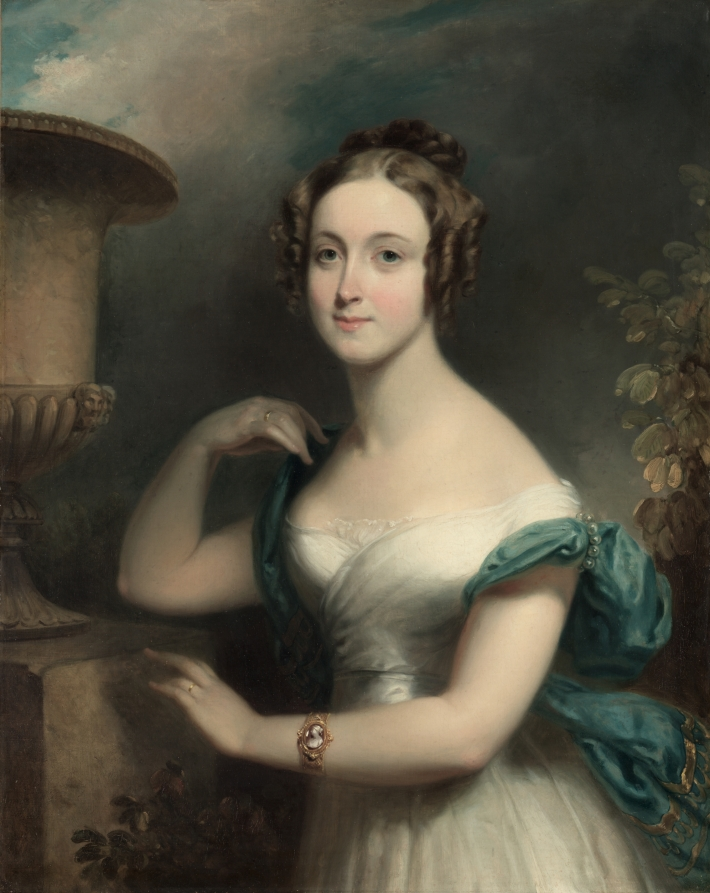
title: Mary Ward Betts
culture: America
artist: Henry Inman (American, 1801–1846)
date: 1830s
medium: oil on canvas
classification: Painting